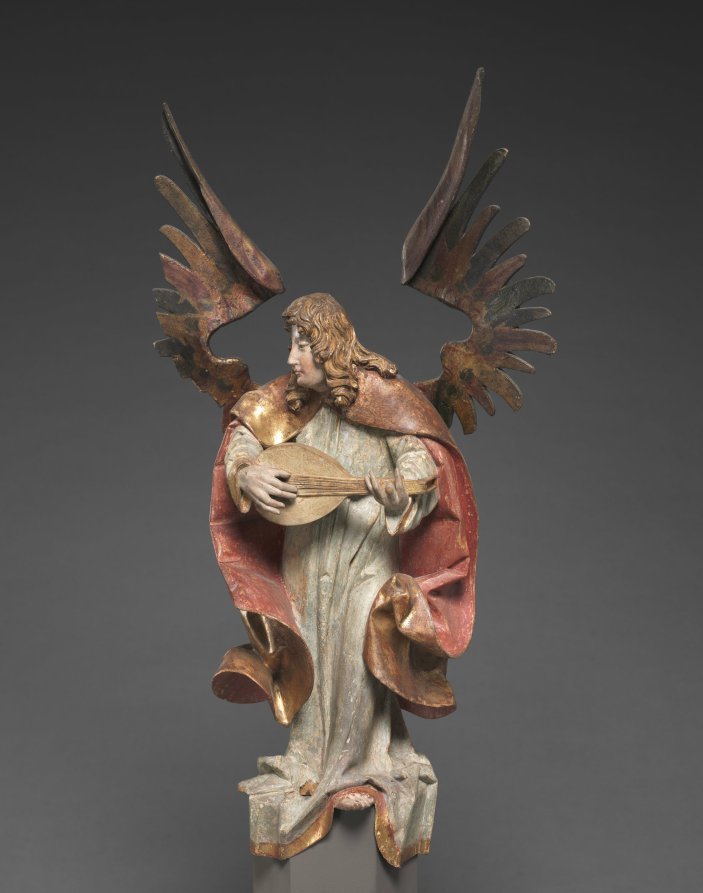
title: Lute-playing Angel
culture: Austria, Tyrol, early 16th Century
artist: Hans Schnatterpeck (Austrian)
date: made shortly after 1503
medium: Black Forest balsalm fir with polychromy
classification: Sculpture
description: This sculpture was originally placed at the top of the altarpiece of the high altar in the church at Nieder Lana, near Meran, in the South Tyrol (now part of present-day North Italy). The sculptor had contracted in 1503 to complete this altar within eight years for the payment of 1,600 gilders. Hans Schnatterpeck was originally from Landsberg am Lech in Bavaria. By 1478-79 he had settled in Meran where he operated the leading workshop in the area. This angel is a surviving element from his most famous work, the largest Gothic altarpiece of the Alpine region. Other elements survive in various public and private collections.